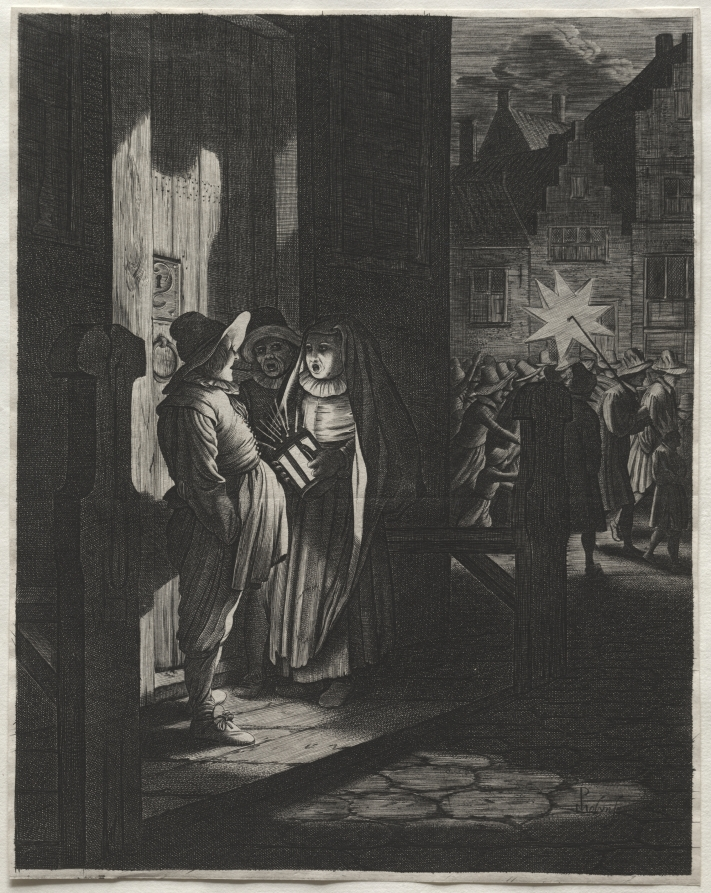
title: Star of Kings, A Night Piece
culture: Netherlands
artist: Jan van de Velde (Dutch, 1620–1662)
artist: after Pieter Molyn (Dutch, 1595–1661)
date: 1630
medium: engraving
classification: Print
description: Star of Kings depicts the holiday of Epiphany, or Twelfth Night, celebrated on January 6, and commemorates the journey of the three Maji to the Christ child, guided by the Star of Bethlehem. In 17th-century Netherlands, the event was recreated by townspeople who gathered at dusk and processed through the streets singing and carrying candles and torches, following one of the most prominent citizens who had the honor of holding the star.